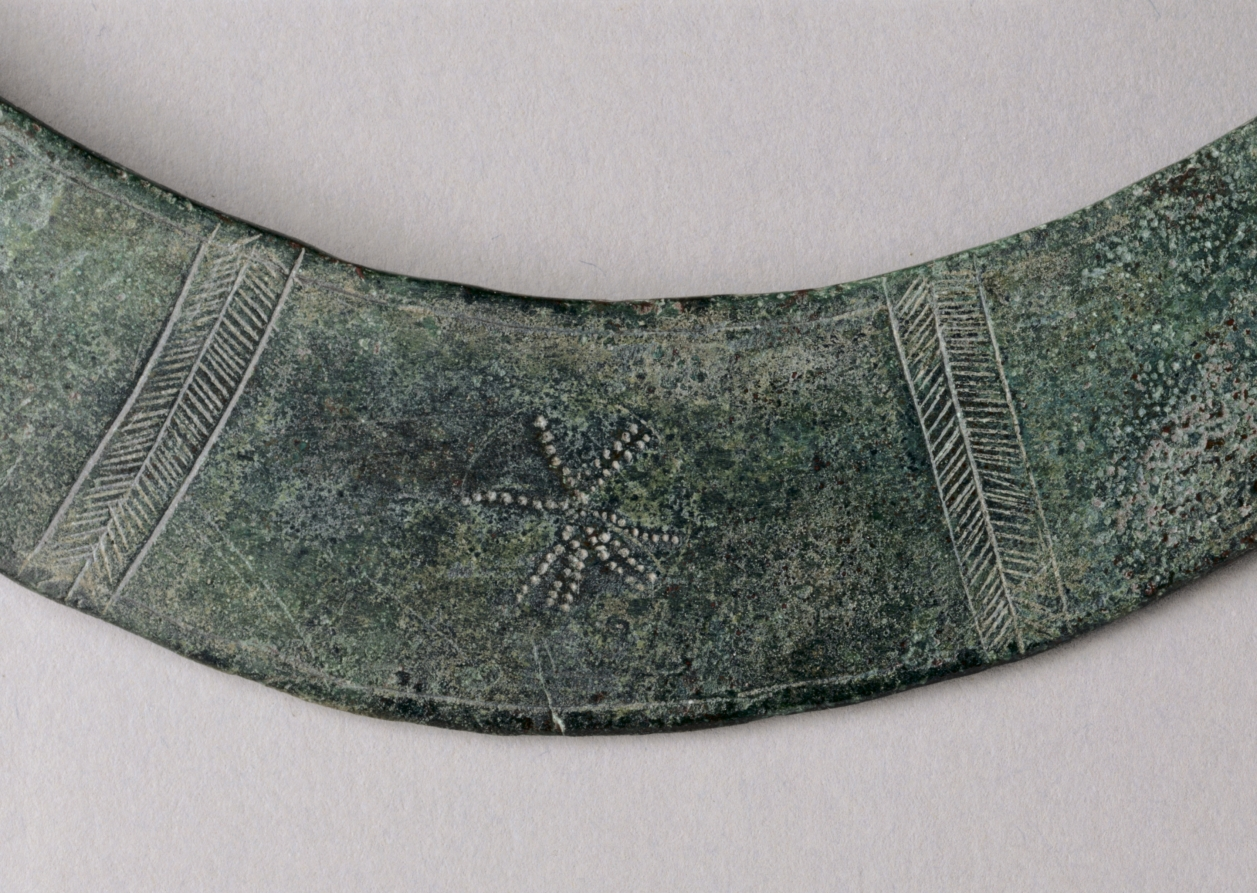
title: Fibula with Solar Design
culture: Greece, Boeotia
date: c. 700–675 BCE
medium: bronze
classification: Metalwork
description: The crescent body of this bronze fibula (brooch) features both incised and punched decoration. Three sets of three arrows have been interpreted as indicating the daily route of the sun, shown at the arc’s center as a series of radiating punch marks within a shallowly incised circle. When worn, the arc may have hung downward, a large ornamental addition to the functional pin used to secure its wearer’s clothing.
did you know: A fibula is an ancient safety pin that held garments in place.